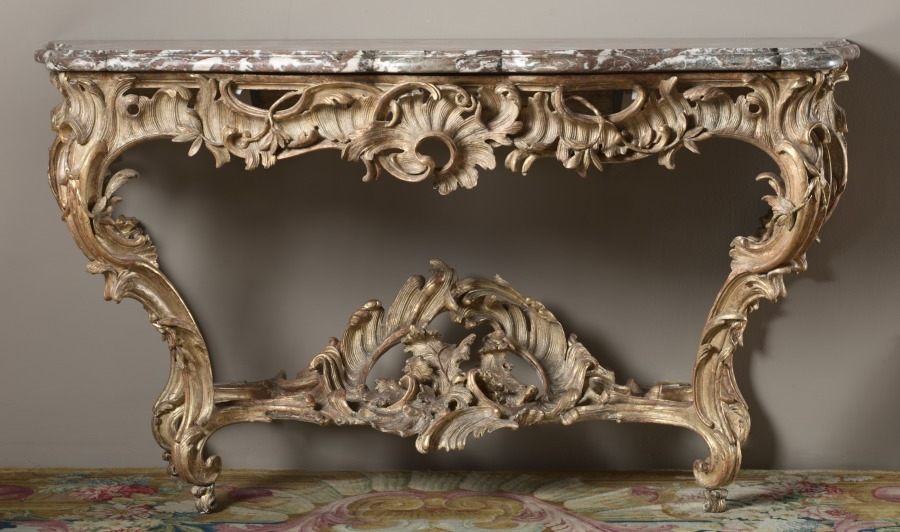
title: Console Table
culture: France, mid-18th Century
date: c. 1730– 1740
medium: gilt wood, marble top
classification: Furniture and woodwork